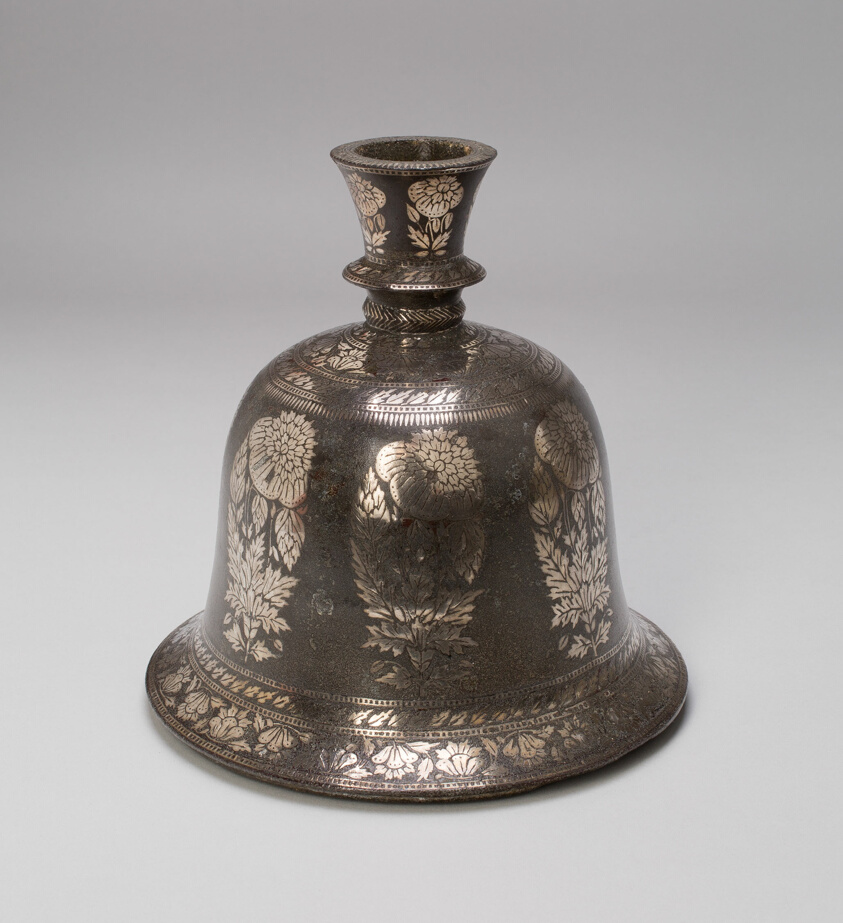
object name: Decorative Arts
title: Bell-Shaped Huqqa Base with Floral Design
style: South Asian, mughal, Indian (South Asian), asian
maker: India; Deccan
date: 18th/19th century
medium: Zinc alloy inlaid with copper and silver (bidriware)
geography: Hyderabad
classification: equipment for smoking and tobacco use; silver; metalwork; asian art; decorative arts